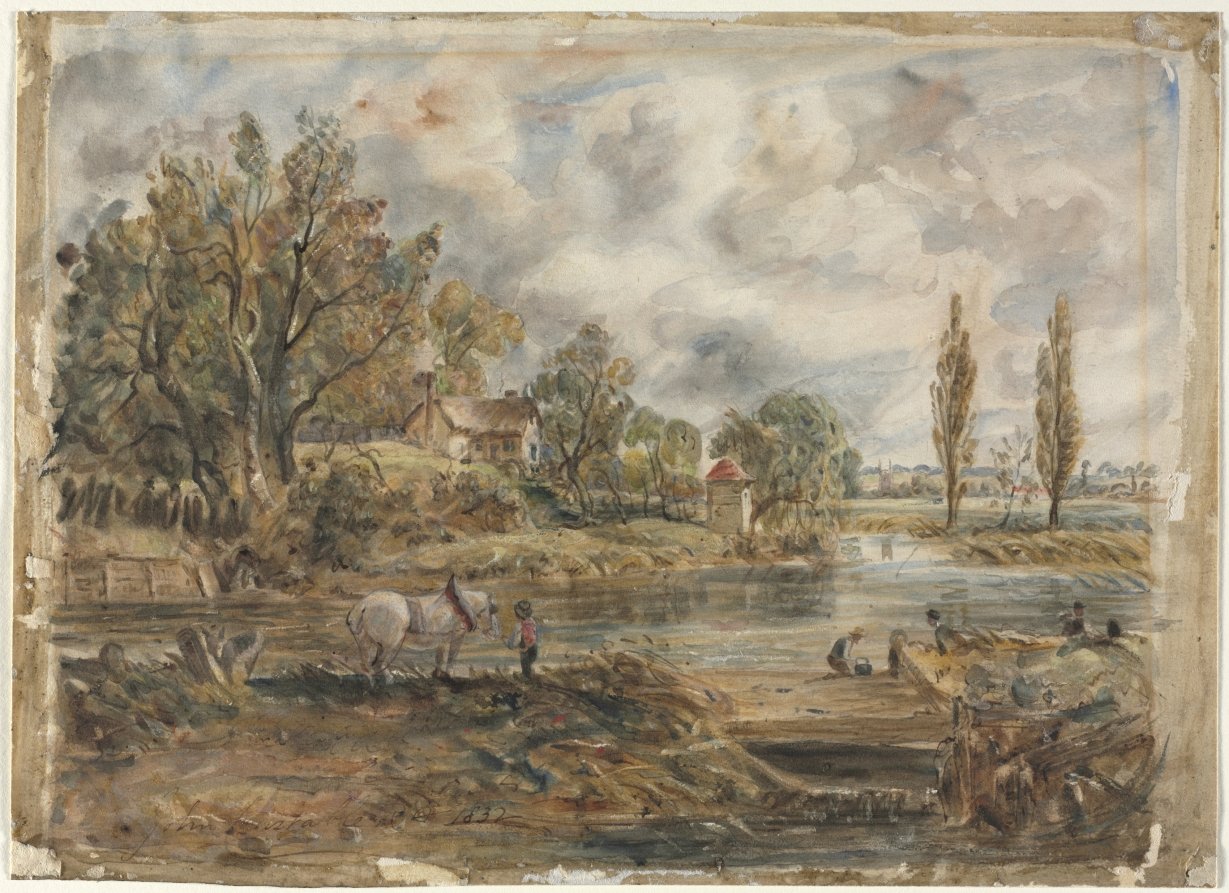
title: The White Horse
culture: England, 19th century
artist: imitator of John Constable (British, 1776–1837)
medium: watercolor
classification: Drawing